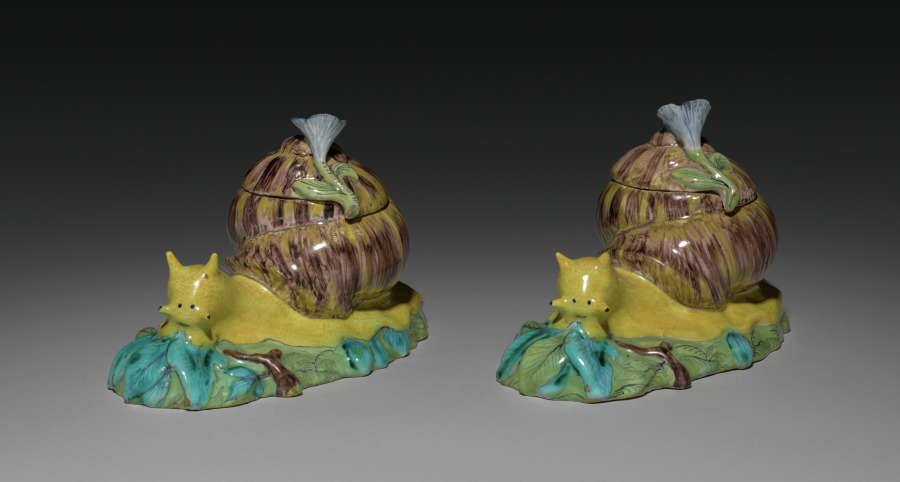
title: Pair of Covered Boxes in the Form of Snails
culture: France, 18th century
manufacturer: Strasbourg Factory (France)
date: c. 1750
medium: faience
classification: Ceramic